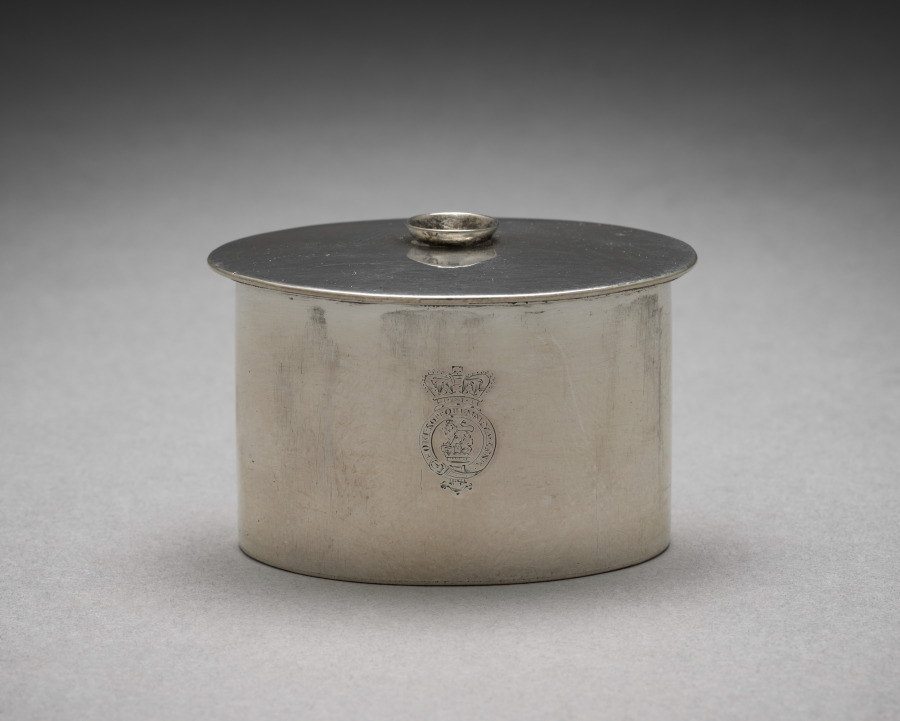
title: Cover for a Hot Water Jug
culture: England, early 19th century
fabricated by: John (British) Edwards (British)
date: 1800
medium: silver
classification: Silver